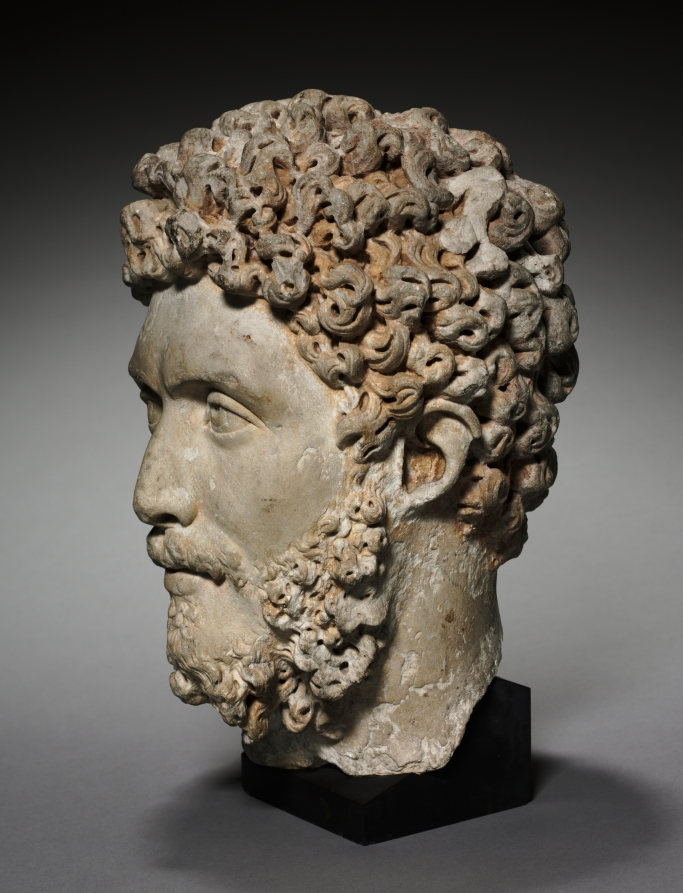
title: Portrait Head of a Noble or Official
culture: Italy, Roman, Antonine period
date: 175–200 CE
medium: marble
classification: Sculpture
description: A nobleman or government official is likely depicted in this portrait of a curly-haired man with a full beard. These features, together with drilled pupils and irises on the eyes, typically do not appear in Roman sculpture prior to the reign of Hadrian (AD 117–38), an admirer of Greek culture. Deeply carved beards and curls remain popular in portraiture throughout (and beyond) the Antonine period (AD 138–92), when this sculpture was probably made.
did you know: When acquired, this portrait was thought to depict Lucius Verus, co-emperor with Marcus Aurelius (reigned AD 161–69).